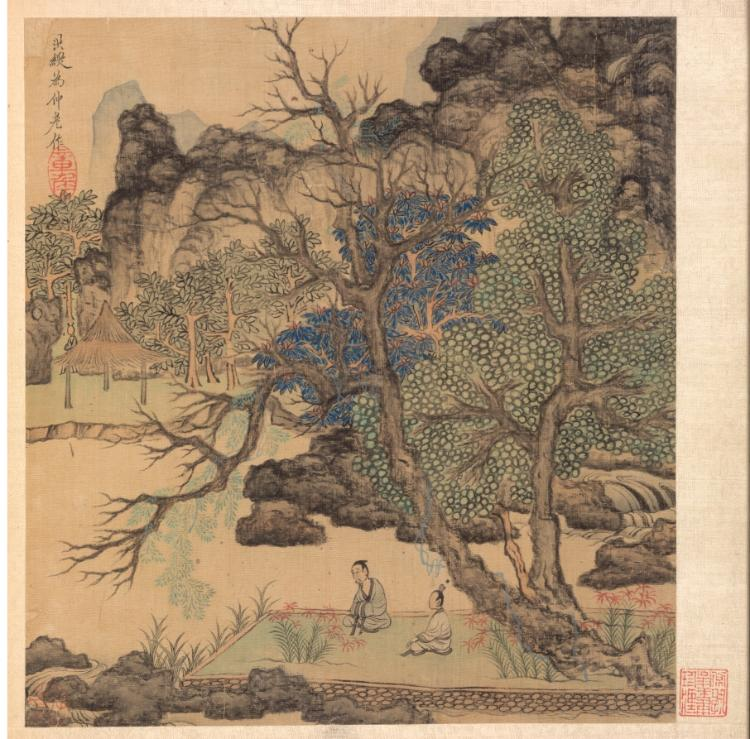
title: Paintings after Ancient Masters: Scholars in a Garden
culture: China, Ming dynasty (1368–1644)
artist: Chen Hongshou (Chinese, 1598/99–1652)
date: 1598–1652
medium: album leaf; ink and color on silk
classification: Painting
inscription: Hongshou painted for old Zhong. [Seal] Zhanghou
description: The twenty paintings in this double-album by Chen Hongshou include landscapes, figures, and flowers. It also has one leaf featuring a woman, an often-used subject not found in the other albums from the latter part of his career. His late works are wonderful summations of Chen's peculiar and quirky art--archaistic, hyper-refined--but without accompanying shallowness or sentimentality. His figures and landscapes in the late albums are miniaturized, not unlike the small Chinese gardens, or the carefully selected small table rocks or old roots used for contemplation to see the world in miniature. This loss of scale is quite deliberate and reflects the psychological situation of a depressed class like the Ming loyalist officials and scholars, deprived of their integrity and honor, and forced to lead a diminished and restricted existence.